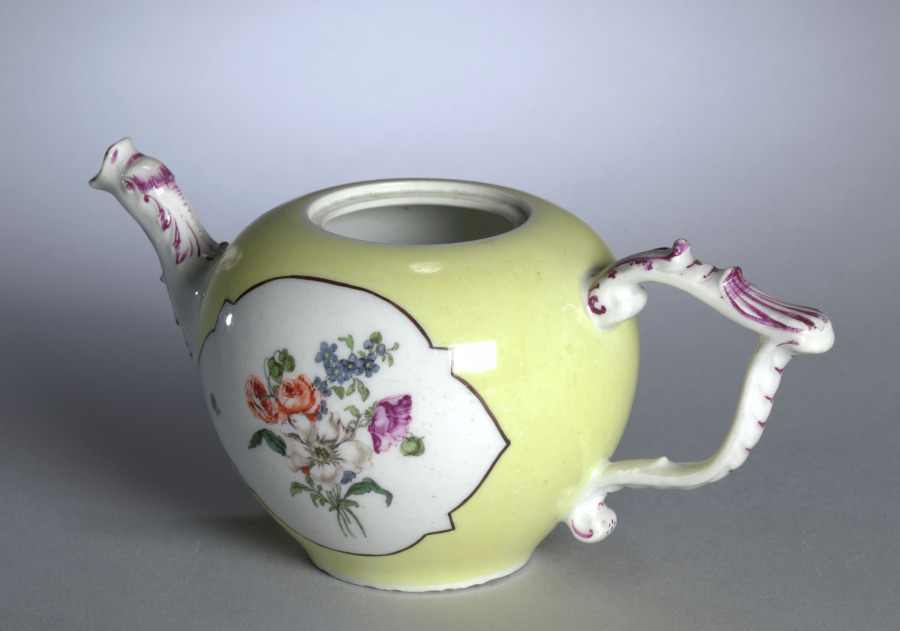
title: Teapot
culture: Germany, Meissen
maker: Meissen Porcelain Factory (German, est. c. 1710)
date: c. 1750–70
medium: porcelain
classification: Ceramic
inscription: Mark on the bottom that looks like two swords crossing, with a small V intersecting.